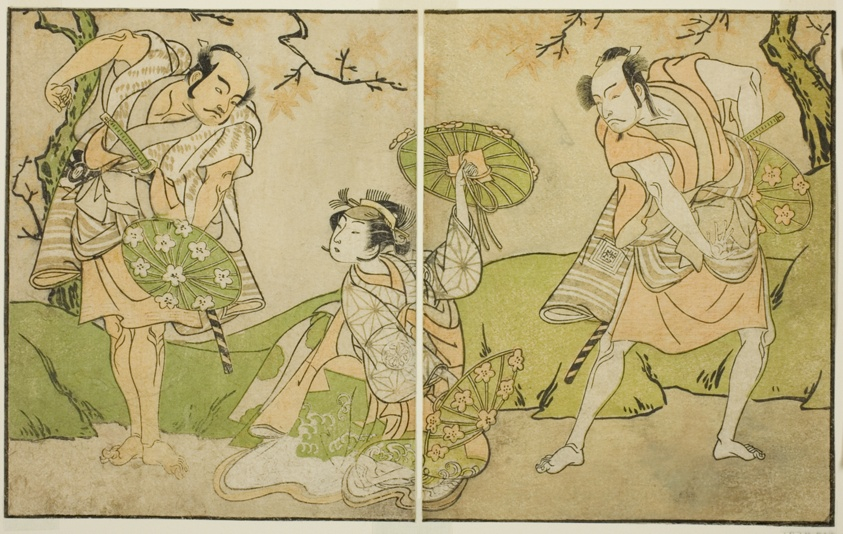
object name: Print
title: The Actors Ichikawa Somegoro (right), Segawa Kikunojo II (center), and Bando Sampachi (left), in Unidentified Roles in the Play Myoto-giku Izu no Kisewata, Performed at the Ichimura Theater in the Eleventh Month, 1770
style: Japanese (culture or style)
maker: Katsukawa Shunsho 勝川 春章; Japanese, 1726-1792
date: c. 1772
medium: Color woodblock print; from the illustrated book Yakusha Kuni no Hana (Prominent Actors of Japan)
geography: Japan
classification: woodblock print; print; asian art